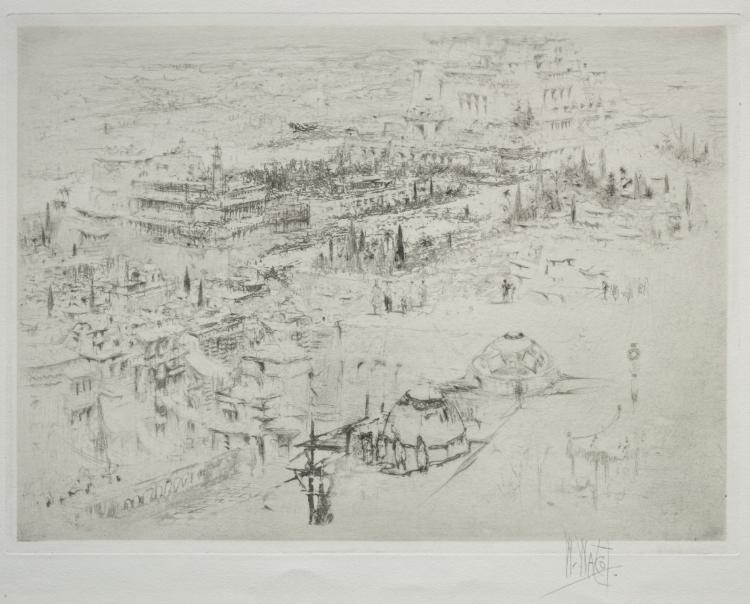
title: Temple of Baal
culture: England, 20th century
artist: William Walcot (British, 1874–1943)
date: 1918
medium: etching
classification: Print